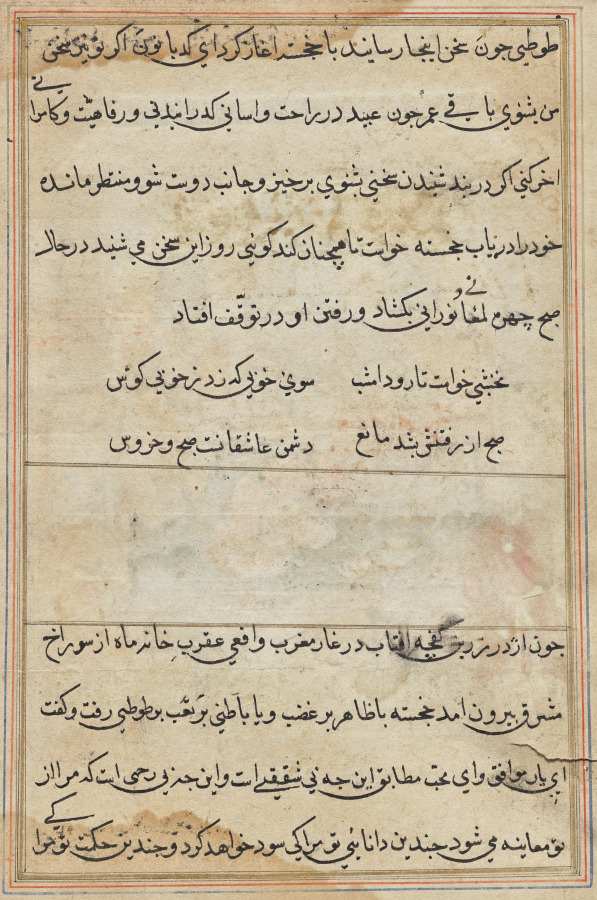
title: Page from Tales of a Parrot (Tuti-nama): text page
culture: Mughal India, court of Akbar (reigned 1556–1605)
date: c. 1560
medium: gum tempera, ink, and gold on paper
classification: Painting